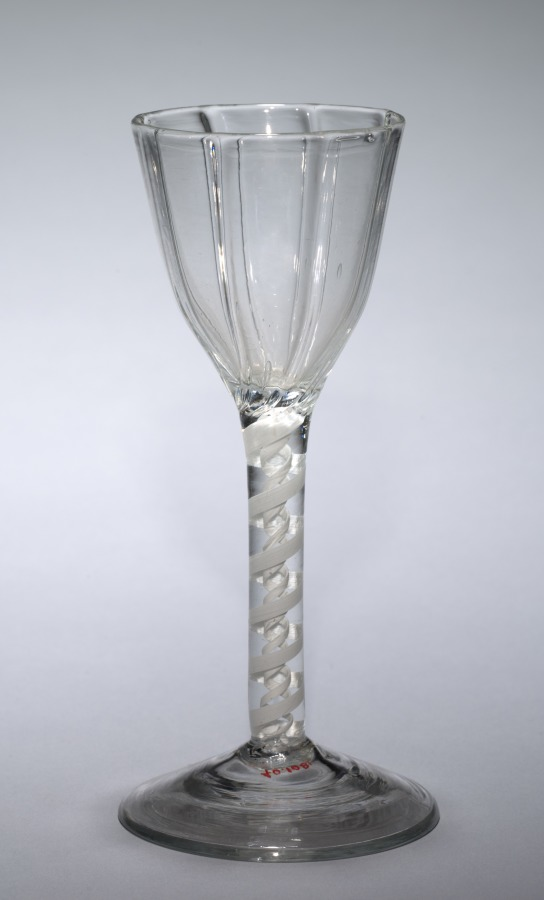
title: Wine Glass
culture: England, late 18th-early 19th century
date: 1775–1810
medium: glass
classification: Glass